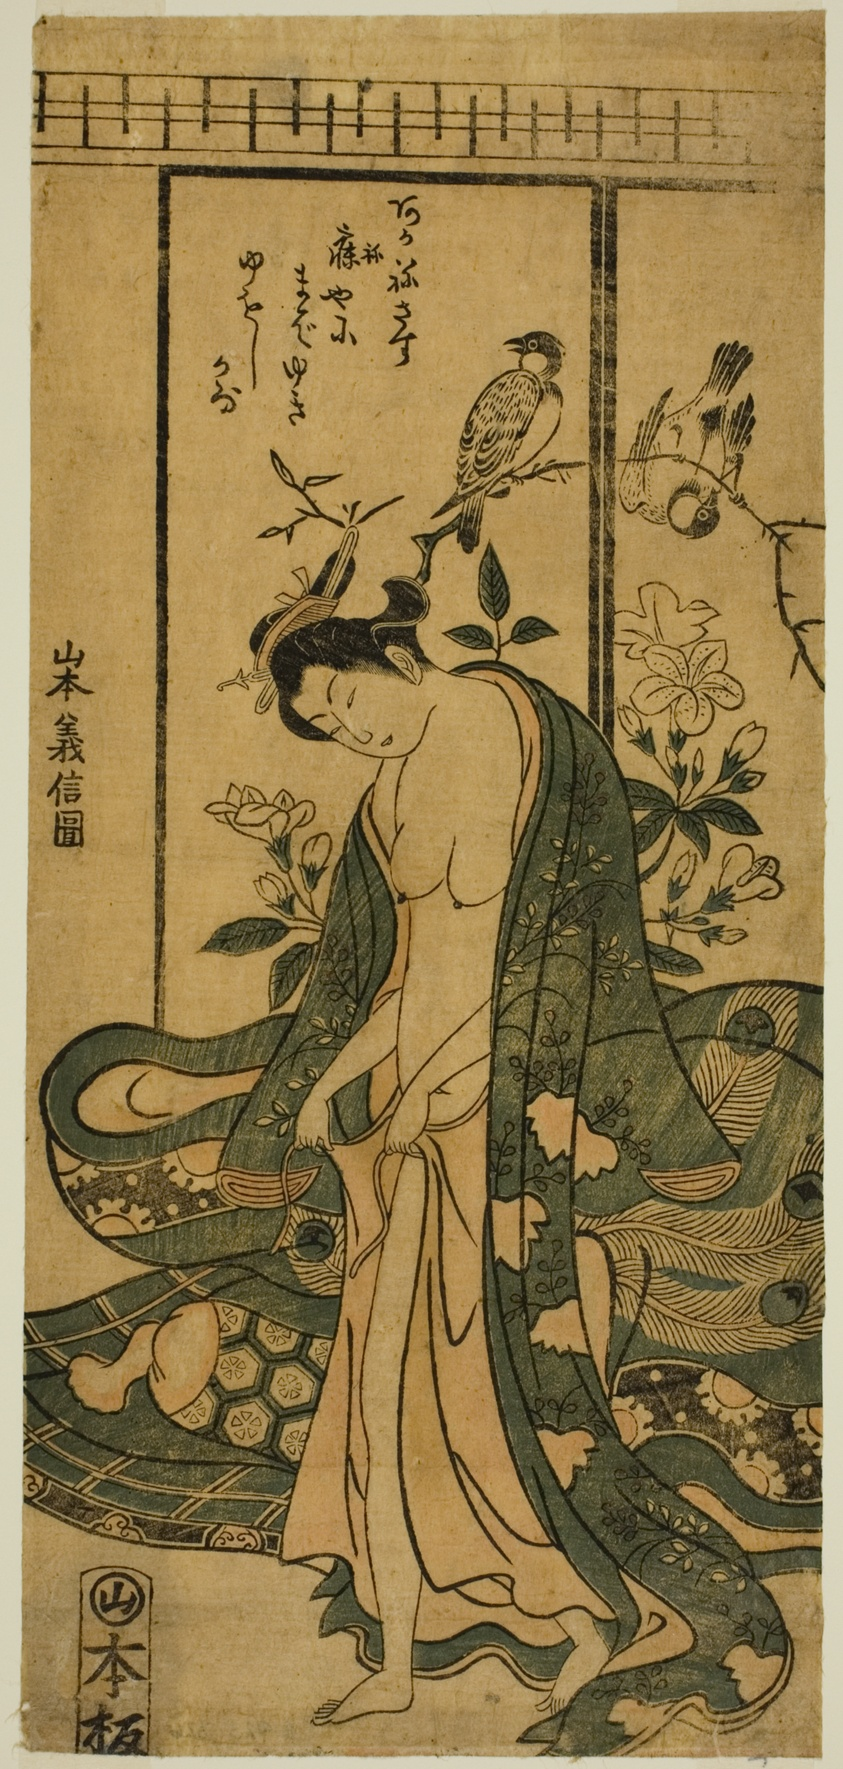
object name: Print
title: Young Woman Dressing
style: Japanese (culture or style)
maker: Yamamoto Yoshinobu (Japanese, active c. 1745-58)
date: c. 1745/58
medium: Color woodblock print; hosoban, benizuri-e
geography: Japan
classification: woodblock print; print; asian art